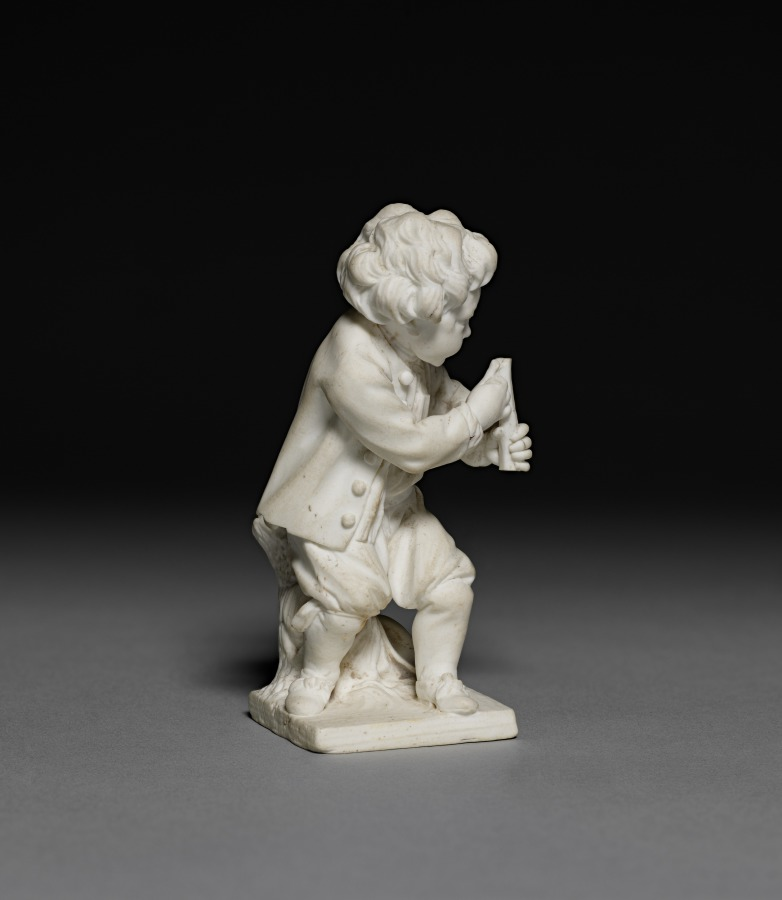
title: Figure of a Mischief Maker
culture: France, Sèvres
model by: Etienne-Maurice Falconet (French, 1716–1791)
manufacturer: Sèvres Porcelain Factory (French, est. 1756)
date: 1766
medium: Unglazed soft-paste porcelain (biscuit)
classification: Ceramic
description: Over a period of three years, designs for 17 young children involved in various activities were issued by sculptor Étienne-Maurice Falconet after which they were regularly reproduced as porcelain figurines. This figure, who pulls back a slingshot, would have been modeled after one of these designs. Decorative figurines like these were often included in elaborate dining services to be placed about a table along with the usual tureens and tableware.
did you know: Thirty-one figures modeled after Falconet’s series were included in the dinner service given by French King Louis XV to Christian VII, King of Denmark, in 1768.